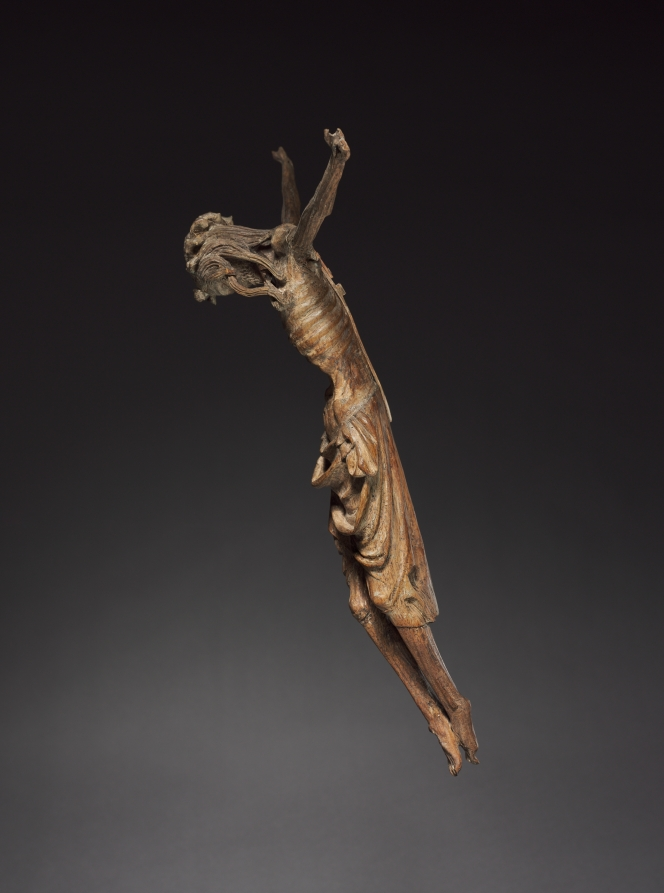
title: Crucified Christ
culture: Germany, Cologne, 14th century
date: c. 1340–1350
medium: wood (walnut) once polychromed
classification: Sculpture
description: The striking impression of this figure is the vivid representation of suffering. The sculpture captures the moment after Christ’s death: the drooping head on a frail neck is a mask of agony. The eyes are nearly shut, the mouth is ajar, and the forehead crowned by heavy, gouging thorns is drawn with pain. The elongation of the body is emphasized by the emaciated chest with protruding ribs and bony limbs. The resulting sense of frailty and pathos is augmented by the heavy strands of hair that uncurl alongside the tormented face and by the loincloth folds that break the downward drape of the body. The sculpture belongs to a group of emotional crucifixes and pietas carved in the Middle-Rhine region for over a century beginning around 1300, examples of which are principally found in the city of Cologne. Such sculptures appealed to the Rhenish mystics, who advocated meditation based on the Passion of Christ.